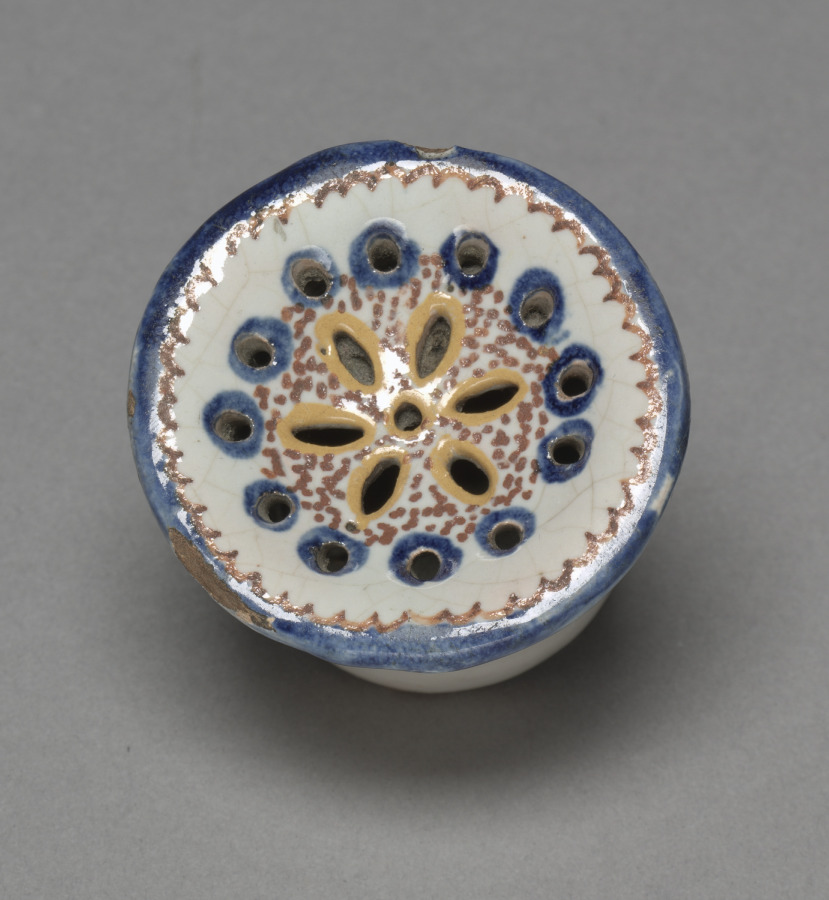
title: Inkwell from Writing Stand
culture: France, Sinceny, 18th century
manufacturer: Sinceny Factory (French)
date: 1746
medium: Tin-glazed earthenware (faience) with enamel decoration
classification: Ceramic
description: The faience factory at Sinceny was an offshoot of that at Rouen. In style, Sinceny closely resembles later Rouen wares with polychrome decoration. The stylized flowers and insects which decorate this writing stand are entirely typical of Sinceny faience.